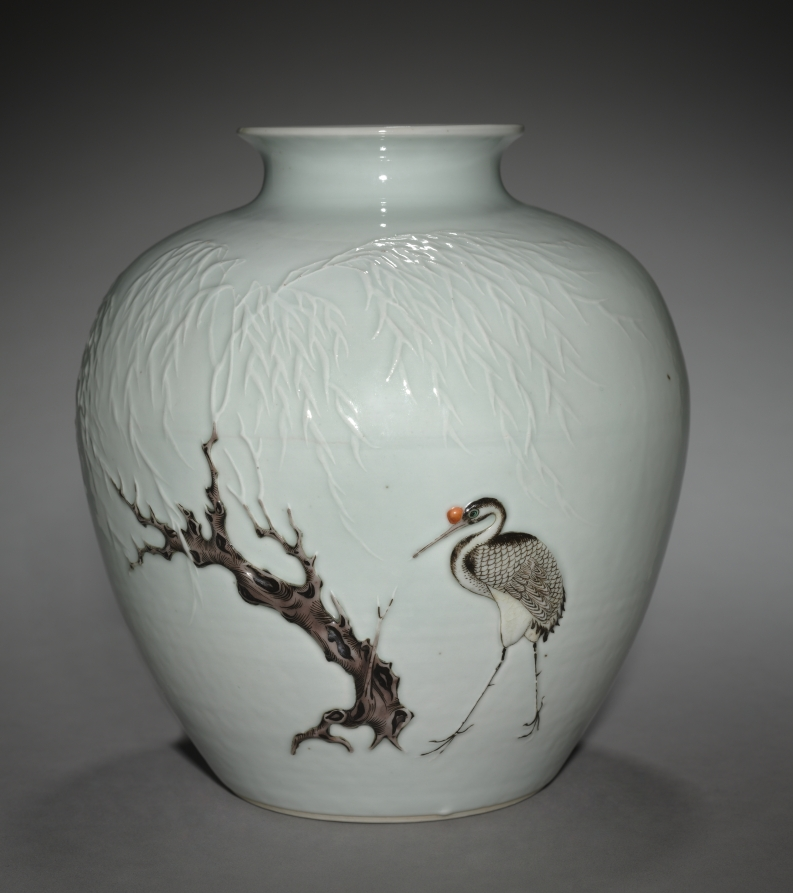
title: Jar with Crane and Willow in Relief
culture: China, Jiangxi Province, Jingdezhen kilns, Qing dynasty (1644–1911)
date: 1700s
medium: porcelain with raised and overglaze enamel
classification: Ceramic